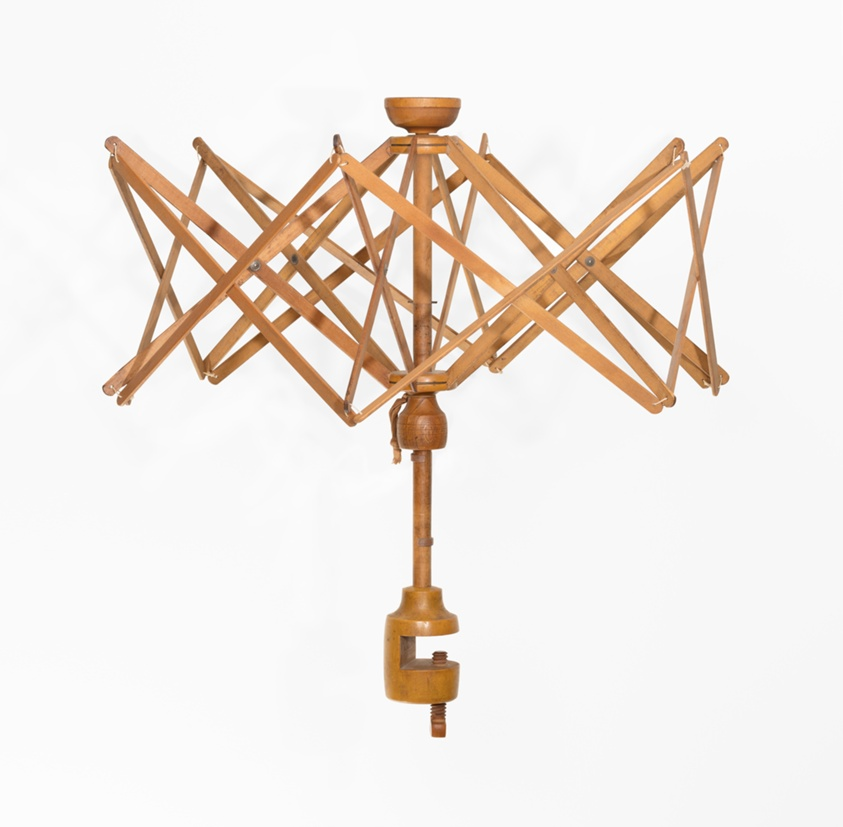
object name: Decorative Arts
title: Swift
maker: Artist unknown (American, Shaker, active 19th century)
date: 1840–50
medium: Maple, birch, iron, and cotton twine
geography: Enfield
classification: wood; swift (textile working equipment); american decorative arts; american arts; decorative arts